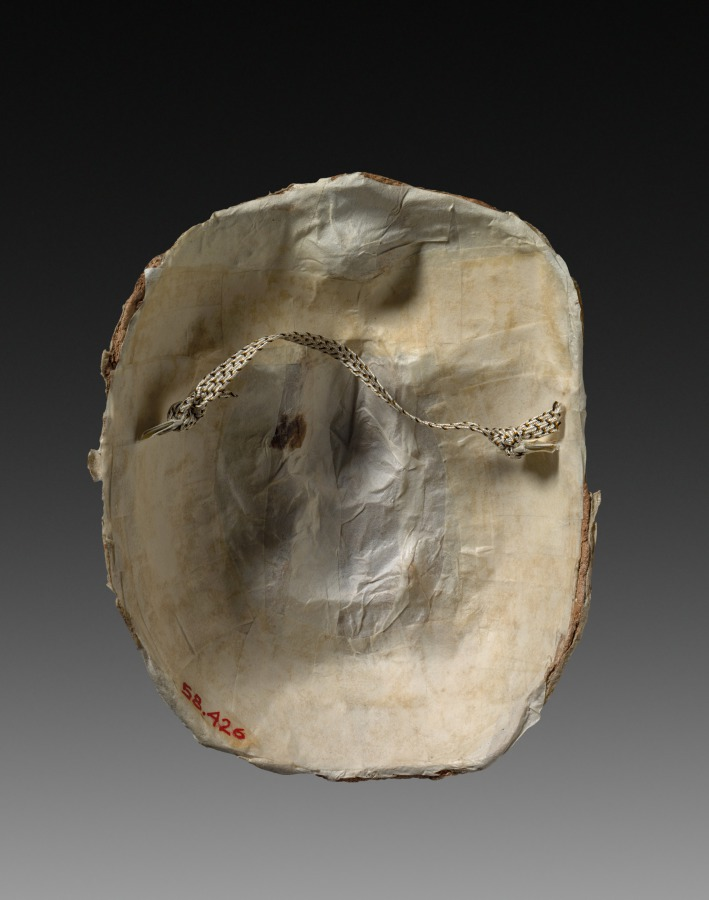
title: Mask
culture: China, Tang dynasty (618-907)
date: 900s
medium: Earthenware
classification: Sculpture